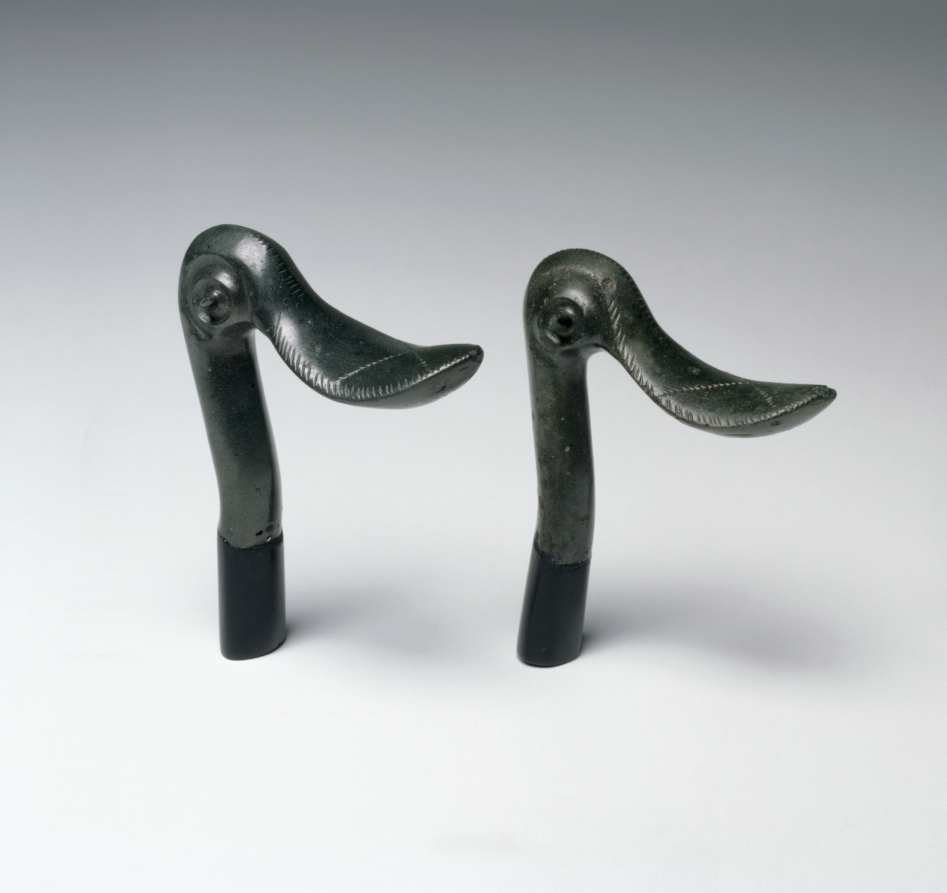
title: Duck Head Finial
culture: possibly Hungary, Bronze Age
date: c. 1400–1300 BCE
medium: bronze, cast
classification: Sculpture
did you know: A decorative object, this duck head finial likely topped a piece of furniture.